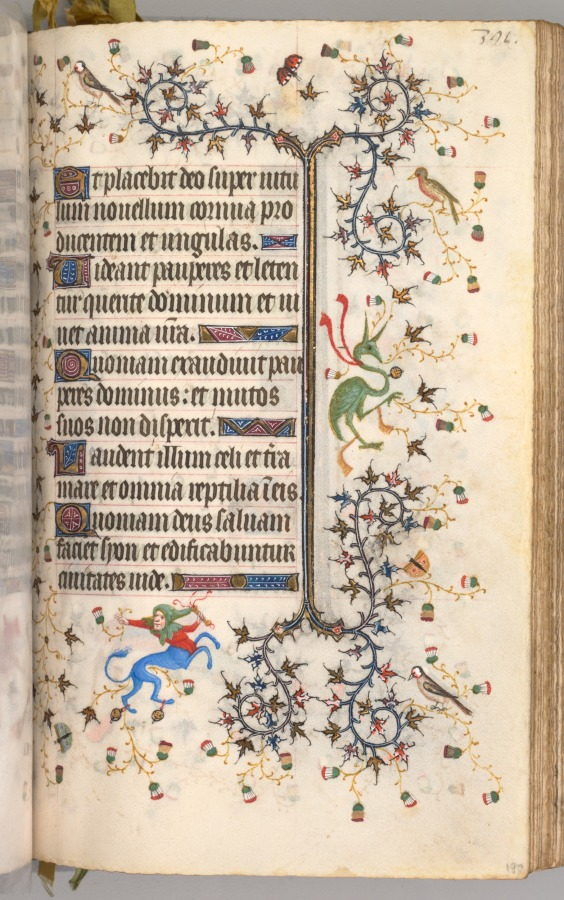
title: Hours of Charles the Noble, King of Navarre (1361-1425): fol. 190r, Text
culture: France, Paris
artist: Master of the Brussels Initials and Associates (French)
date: c. 1405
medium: ink, tempera, and gold on vellum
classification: Bound Volume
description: This precious volume was obviously highly prized by its owner, the French-born King of Navarre, who had his coat of arms painted on no less than twenty folios. Rather than directly commissioning this manuscript from a specific workshop, it seems that Charles the Noble acquired his book of hours -- perhaps ready-made for the luxury market -- while on a trip to Paris in 1404-05. A collaborative effort, six painting styles are evidenced within the pages of this codex, those of two Italians, two Frenchmen, and two Netherlanders. The painter who was responsible for the planning and decoration of the book, and who produced seventeen of the large miniatures, was a Bolognese artist known as the Master of the Brussels Initials. His principal assistant, responsible for most of the borders, was a Florentine who signed his name "Zecho" da Firenze on folio 208 verso.